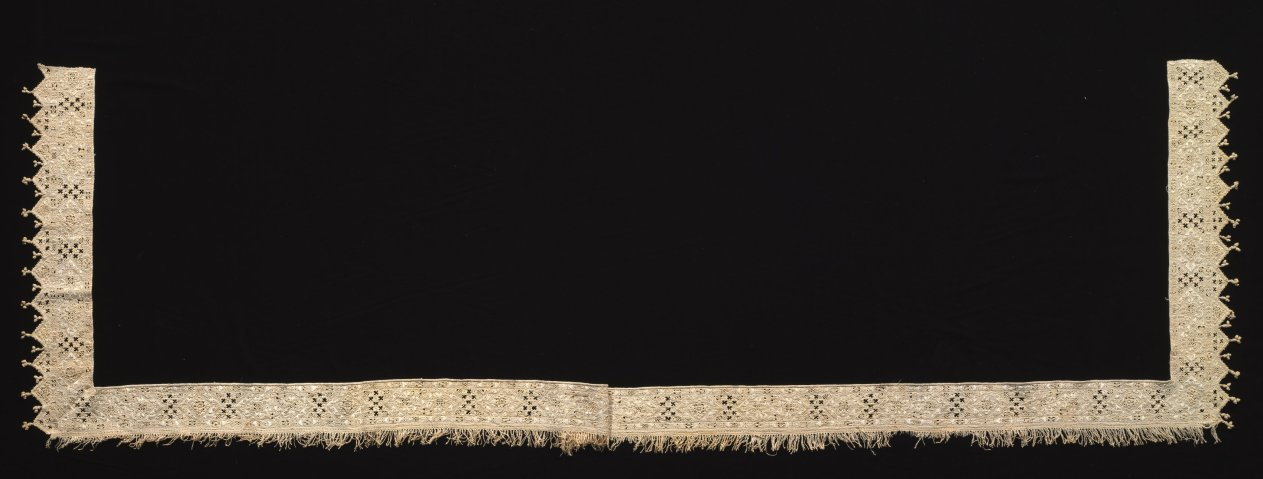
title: Lace Edging for a Sheet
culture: Italy, 1600-1799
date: 1600–1799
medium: Linen: needle lace (cutwork) and silk embroidery, silk fringe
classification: Lace